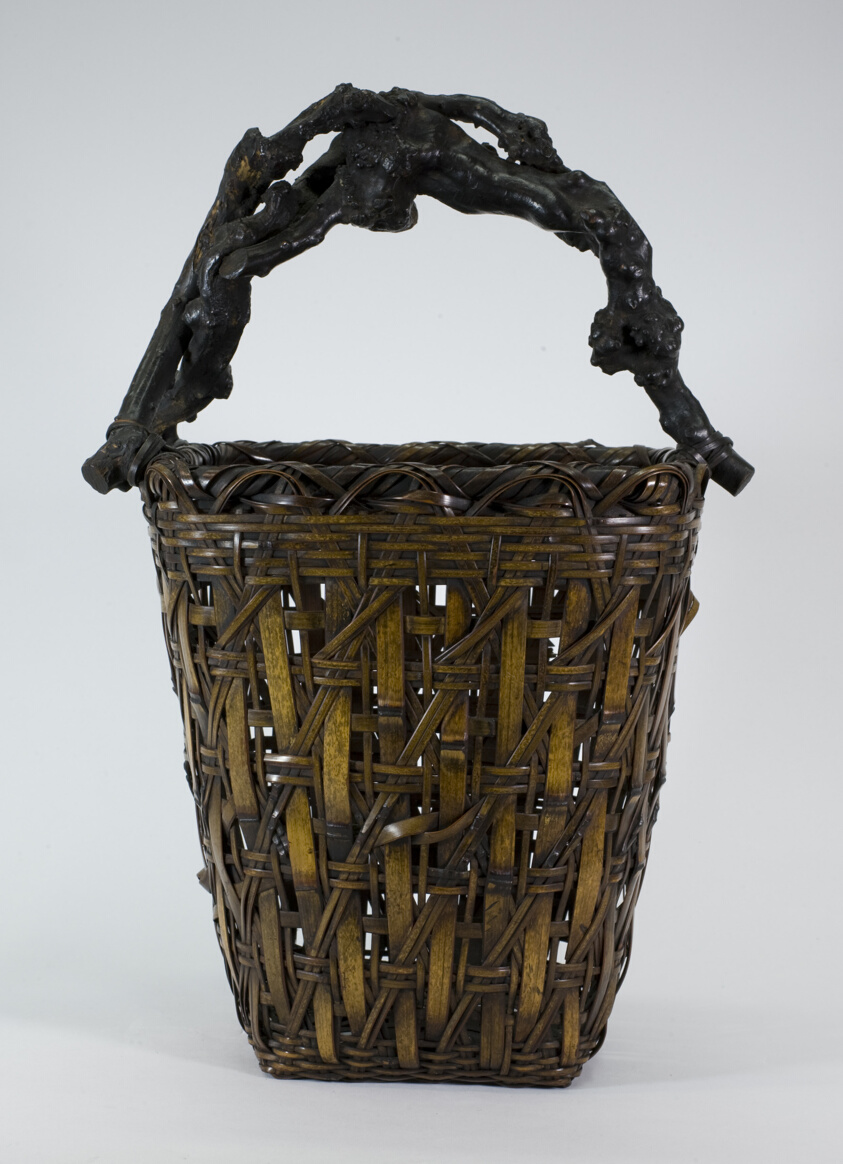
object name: Decorative Arts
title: Rectangular Flower Basket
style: Japanese (culture or style)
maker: Japan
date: c. 1900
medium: Bamboo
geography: Japan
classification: basketry; decorative arts